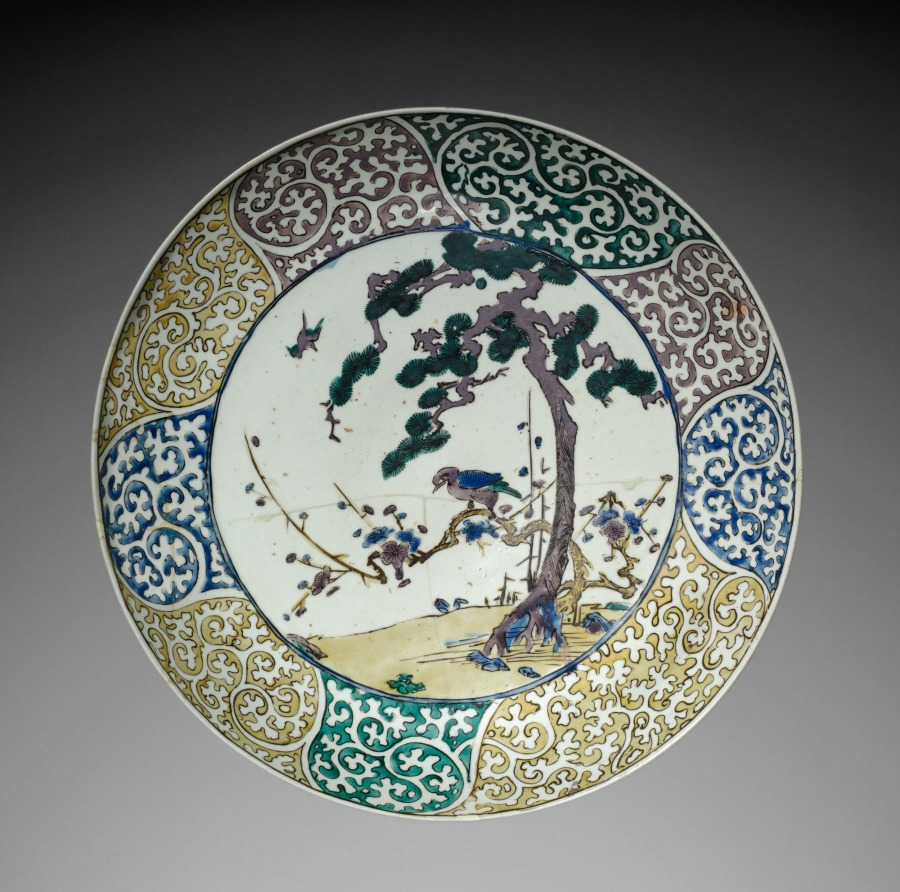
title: Plate with Bird and Flower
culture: Japan, Meiji period (1868–1912) or Taishō period (1912–26)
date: early 1900s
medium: Porcelain with overglaze enamel (Ko-Kutani revival style)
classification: Ceramic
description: This dish is a sophisticated example of later ceramists reinterpreting earlier styles of Japanese porcelain. The colors and patterns used look similar to some works produced on the island of Kyushu in the1600s and 1700s. However, the idea to combine alternating blocks of yellow, green, purple, and blue with a "Chinese grasses" (karakusa) pattern around the rim of the dish is one hit upon in the early 1900s by an artist familiar with the colors and patterns of earlier works.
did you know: Porcelain must be fired at a high temperature to achieve its strength and semitranslucent surface.